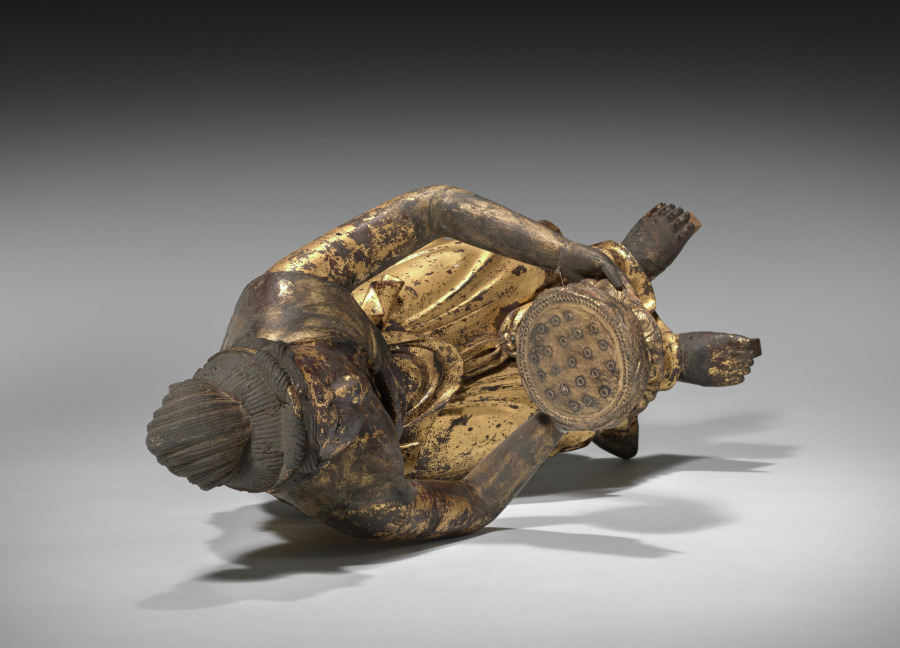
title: Kannon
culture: Japan, Kamakura period (1185–1333)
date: early 1200s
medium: wood with lacquer and gold leaf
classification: Sculpture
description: Kannon, the bodhisattva of compassion, is one of the two bodhisattvas attending Amida, the Buddha of the Western Paradise. The sculpture stands on a lotus pedestal, holding a lotus dais on which the soul of the faithful is received into paradise. The use of gold was prevalent in Buddhist art during this time—it was believed that the yellow light permeated the regions of the Amida—and Amida worship prevailed throughout Japan.